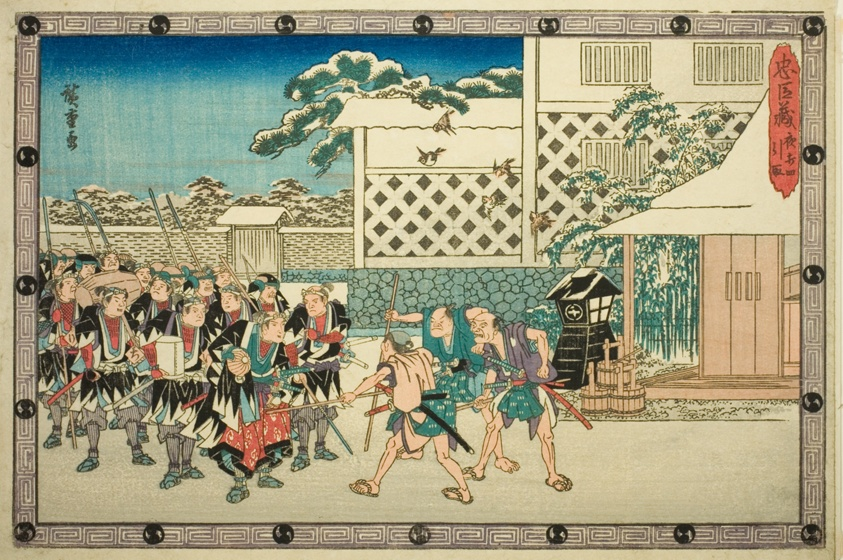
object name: Print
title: The Night Attack, Part 4: The Retreat (Youchi yon, hikitori), from the series "The Revenge of the Loyal Retainers (Chushingura)"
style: Japanese (culture or style)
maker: Utagawa Hiroshige 歌川 広重; Japanese, 1797-1858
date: c. 1834/39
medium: Color woodblock print; oban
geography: Japan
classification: woodblock print; print; asian art